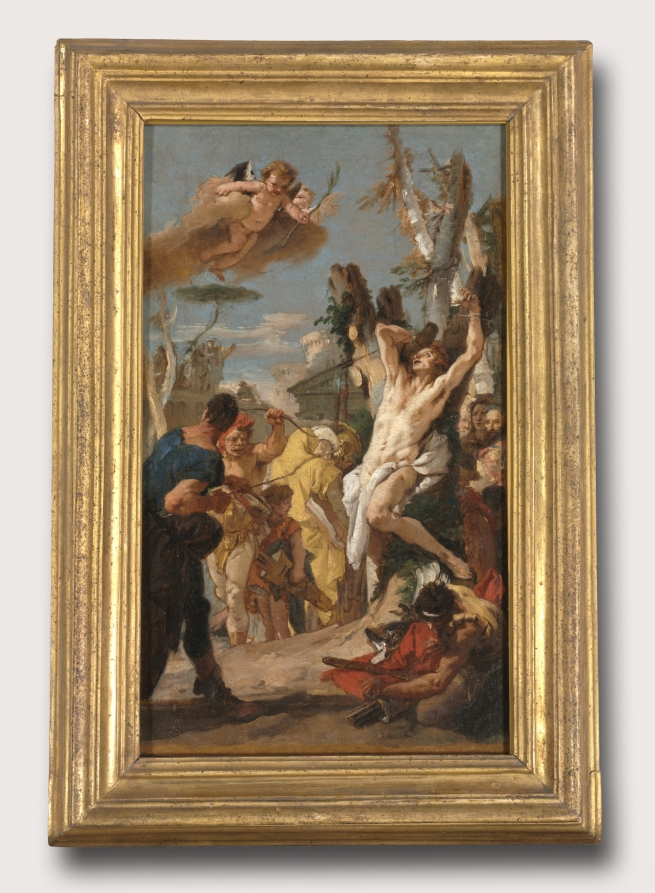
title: Study for "The Martyrdom of Saint Sebastian" (for the Augustinian monastery at Diessen, Germany)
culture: Italy, 18th century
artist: Giovanni Battista Tiepolo (Italian, 1696–1770)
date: 1739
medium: oil on canvas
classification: Painting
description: In 1739 a pair of monumental altarpieces by two Venetian painters (Giovanni Battista Tiepolo and Giambattista Pittoni) were installed in a church in southern Germany, part of a carefully orchestrated decorative program that included architecture, painting, sculpture, and decorative stuccowork. This sketch is Tiepolo’s initial design for his altarpiece, submitted for approval before beginning the final work. With quick, assured brushstrokes, he represents the Christian martyr Sebastian bound to a tree and shot with arrows, flooded with radiant light to symbolize his devotion to his faith.